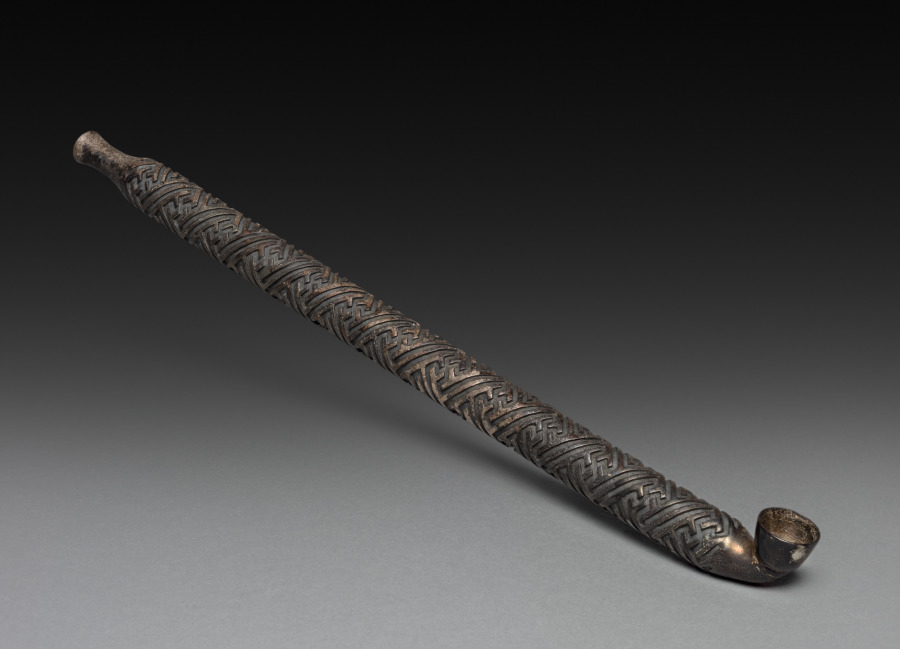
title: Tobacco Pipe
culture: Japan, Edo period (1615–1868)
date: 1700s to mid-1800s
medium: silver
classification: Miscellaneous